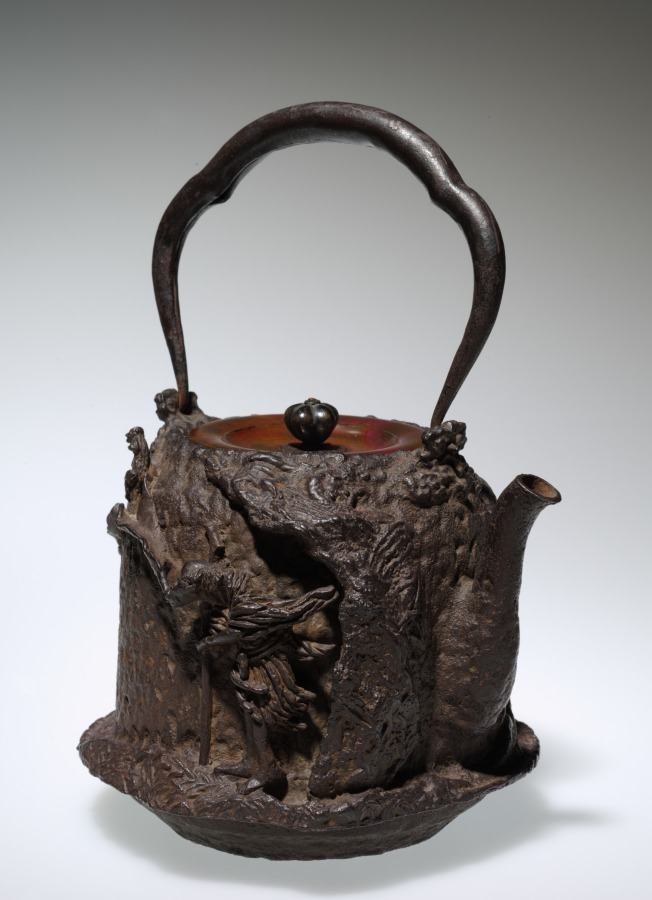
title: Covered Tea Kettle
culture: Japan, Edo period (1615–1868)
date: 1615–1868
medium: iron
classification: Metalwork